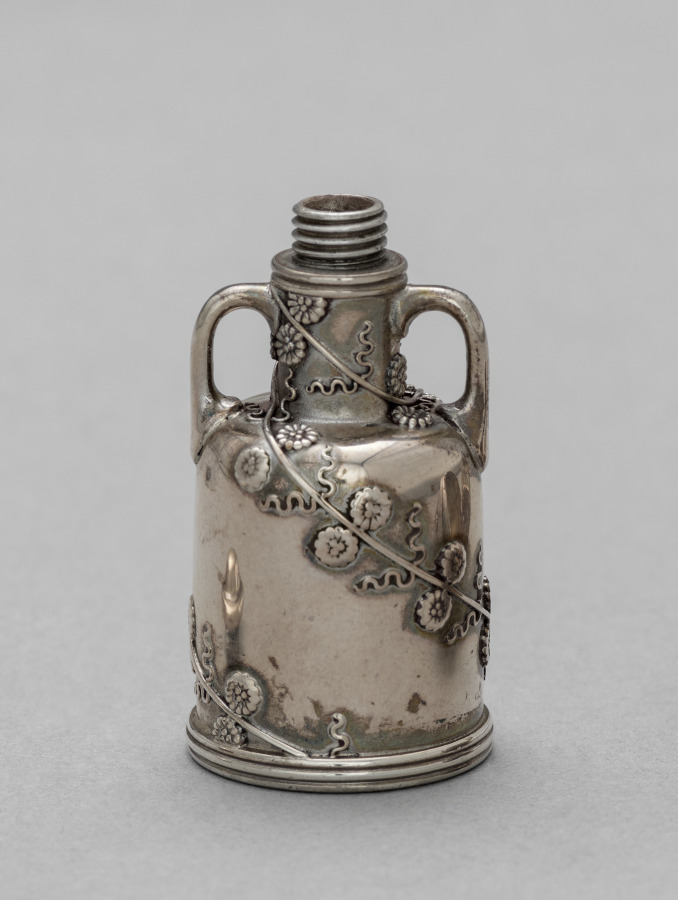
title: Scent Bottle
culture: America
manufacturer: Tiffany & Co. (America, New York, est. 1837)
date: c. 1860–70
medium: silver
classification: Silver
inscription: Inside mark: Tiffany & Co. 2662 (...) - this is too small to read M2108 Union Square